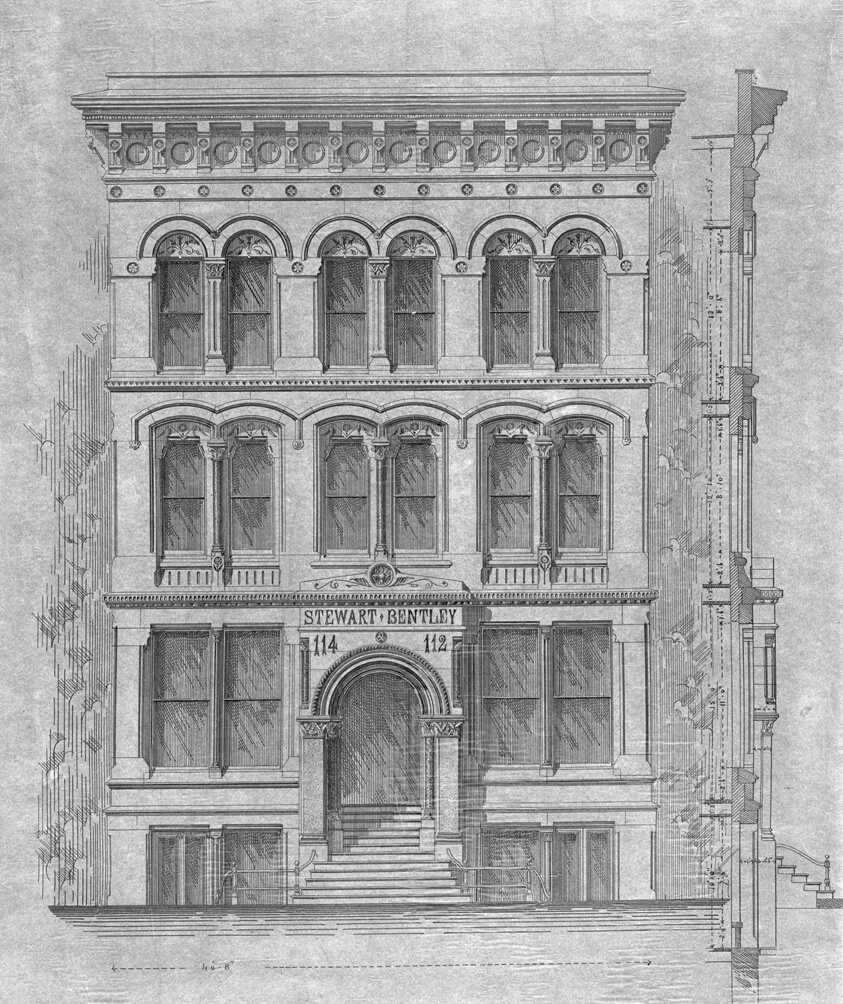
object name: Architectural Drawing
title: Stewart–Bentley Building, Chicago, Illinois, Elevation and Exterior Wall Section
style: 19th century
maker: Carter, Drake and Wight (American, 1871–1873); John Wellborn Root (American, 1850–1891); Peter Bonnett Wight (American, 1838–1925)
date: 1872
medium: Ink on tracing paper, mounted on heavy paper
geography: Dearborn Street, 30-32 North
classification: presentation drawing; architectural drawing; architecture; elevation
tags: Chicago, illinois, design, architecture, elevation, urban planning, buildings, architectural drawing, doorway, drawing, exterior, facade, ornament, windows